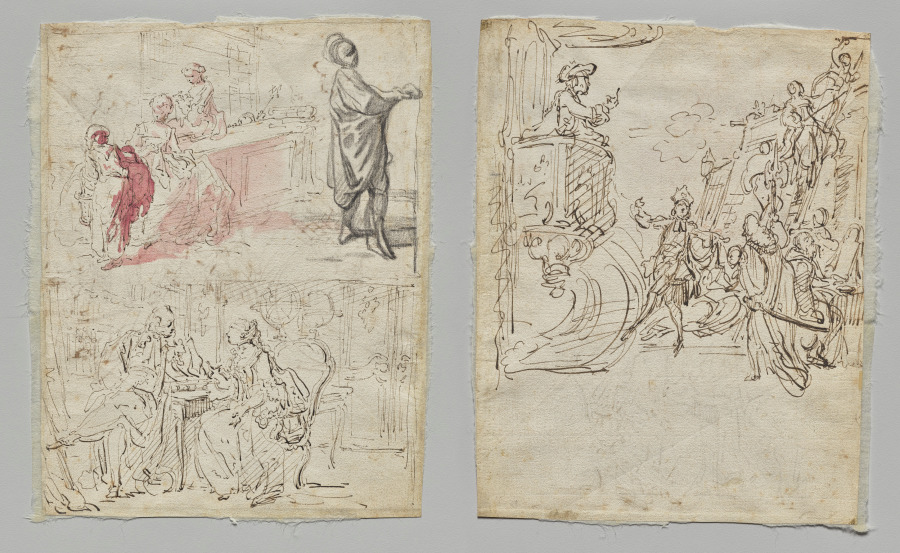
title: Theatre Scene (recto); Lingerie Boutique and Conversation (verso)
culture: France, 18th century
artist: Gabriel de Saint-Aubin (French, 1724–1780)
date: c. 1765–75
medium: Pen and brown ink, black crayon and pink wash on laid paper (recto); pen and brown ink on laid paper (verso)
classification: Drawing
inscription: Watermark: C(?) TORE(?)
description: Gabriel de Saint-Aubin was known for his distinctively sketchy style and interest in depicting performances such as dance and theater, the subjects seen here. The artist developed a distinctive composite style of sketching, and this work exemplifies his practice of covering both sides of a sheet of paper with diverse images in varying media.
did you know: Because of Gabriel de Saint-Aubin’s focus on social events and contemporary culture, his drawings are considered important records of eighteenth-century Parisian life.